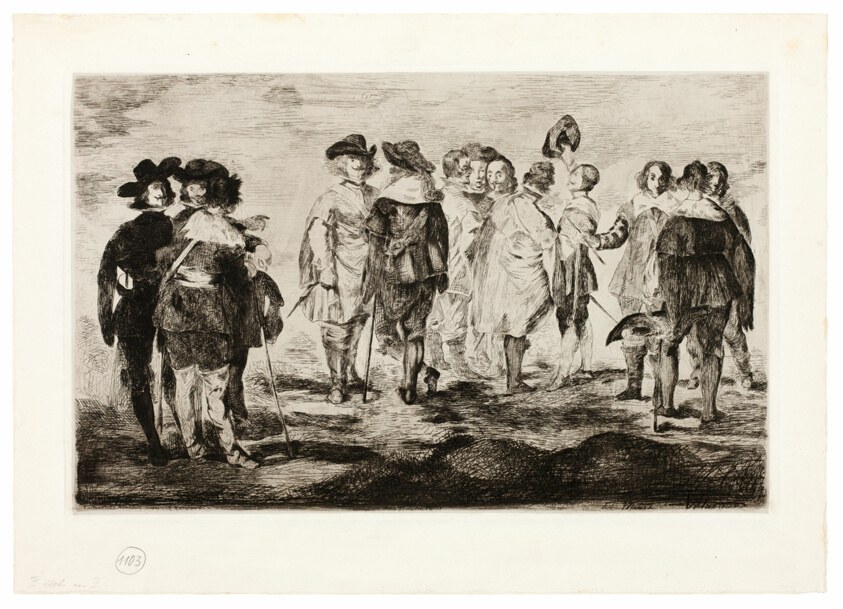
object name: Print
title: The Little Cavaliers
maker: Édouard Manet (French, 1832-1883); after Diego Velázquez (Spanish, 1599-1660); printed by Auguste Delâtre (French, 1822-1907); published by Cadart et Chevalier Editeurs (French, 19th century)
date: 1860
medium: Etching, drypoint, roulette, and bitten tone in black on gray chine, laid down on ivory wove paper (chine collé)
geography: France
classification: etching; print; prints and drawing